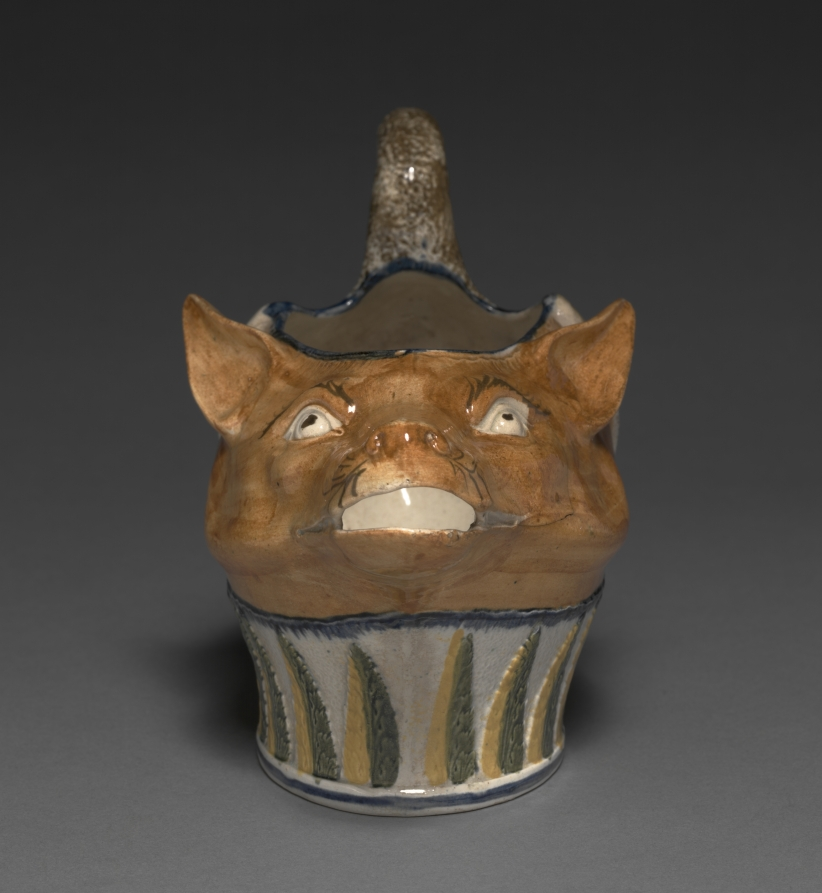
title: Fox and Swan Creamer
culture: England, Staffordshire, 18th century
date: c. 1800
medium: earthenware (Pratt ware)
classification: Ceramic